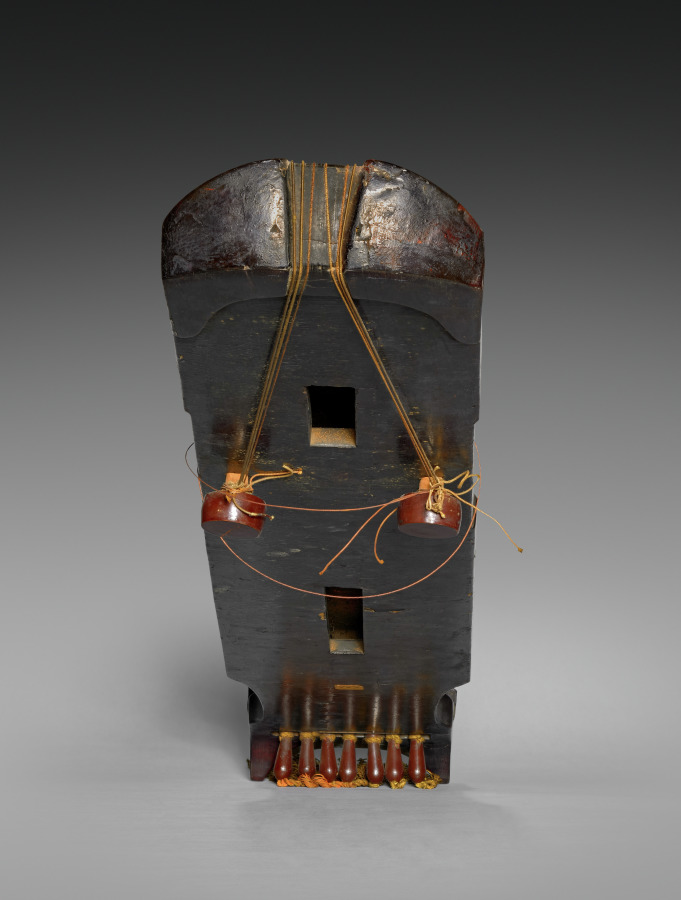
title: Guqin made by Zhang Ruixiu of Suzhou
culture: China, Ming dynasty (1368–1644)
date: 1584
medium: Seven-string Asian long zither, chordophone, made from wood, lacquer, mother of pearl, and silk strings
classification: Musical Instrument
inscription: 為海虞天池先生重斲/ 萬曆甲申古吳張睿脩得古桐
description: China’s most prestigious instrument, the guqin can be traced to the Chu culture almost 2500 years ago. By the late Ming dynasty, Jiangnan was a center of high-end guqin production. Coated in black lacquer, this elegantly crafted instrument is inscribed on the inside, stating it was made by Zhang Ruixiu of Suzhou for Mr. Tianchi of Haiyu, also known as Yan Cheng (1547–1625). Yan was a key figure in guqin music history and founder of the Yushan school in Suzhou. Zhang Ruixiu was a guqin maker, known for achieving a supreme tone quality. Ten instruments attributed to him are known, of which this guqin has the earliest date.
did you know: The 13 studs in mother-of-pearl inlay indicate finger positions for sounding harmonics.